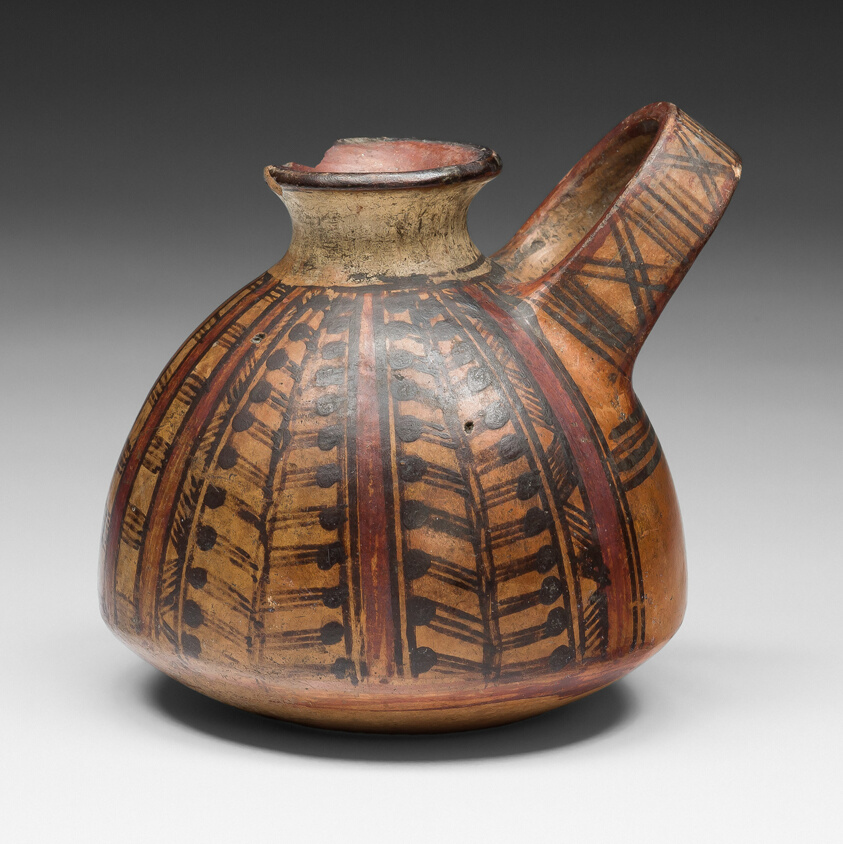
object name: Vessel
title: Miniature Vessel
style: inca, late intermediate period, Pre-Columbian, americas, andes, Arts of the Americas, andean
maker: Inca (South coast or southern highlands, Peru)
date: 1450–1532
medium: Ceramic and pigment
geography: Southern Peru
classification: earthenware; ceramics; vessel; art of the americas; miniature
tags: plant-derived motif, offering